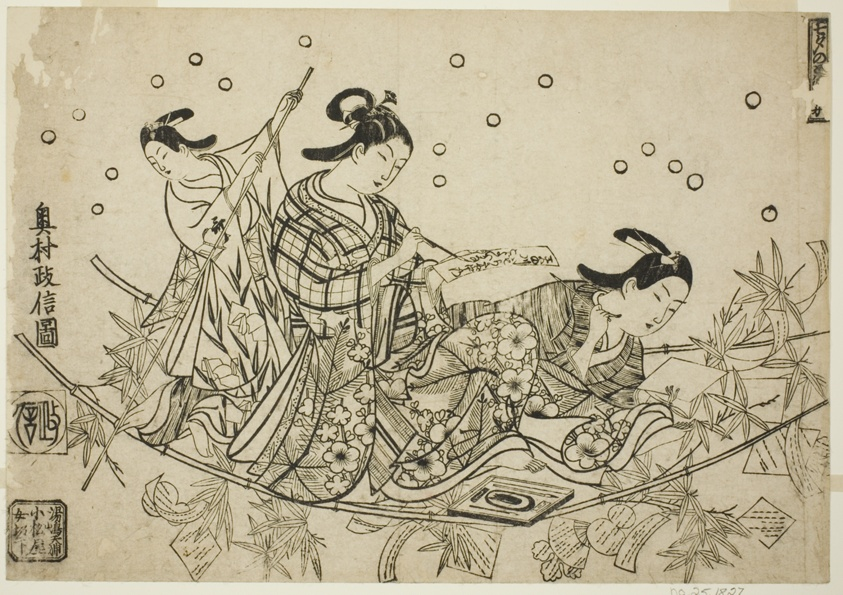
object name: Print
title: The Crossing of the Tanabata Boat (Tanabata no towataru fune)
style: Japanese (culture or style)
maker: Okumura Masanobu (Japanese, 1686-1764)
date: c. 1715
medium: Woodblock print; oban, sumizuri-e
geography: Japan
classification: woodblock print; print; asian art; woodblock